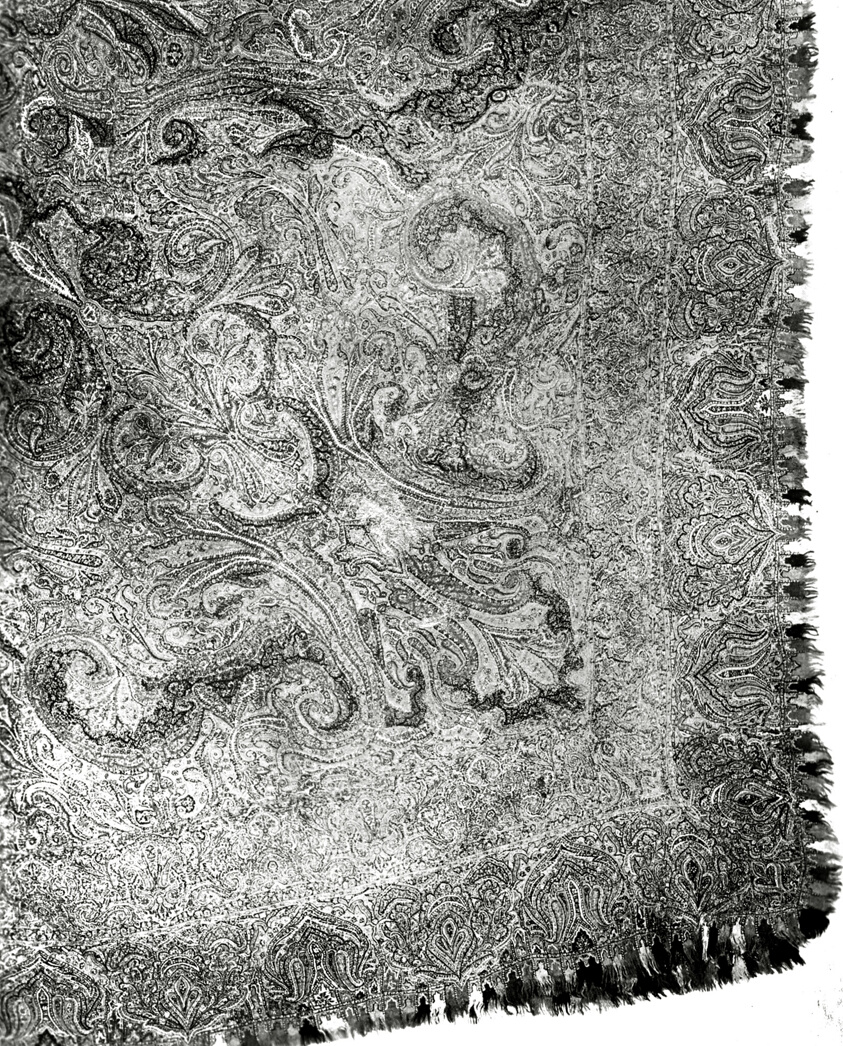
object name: Costume and Accessories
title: Shawl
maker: India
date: 1870s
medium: Interlocking twill weave; small black center; multicolor woven and pieced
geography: India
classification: textile; costume; dress (garment); clothing